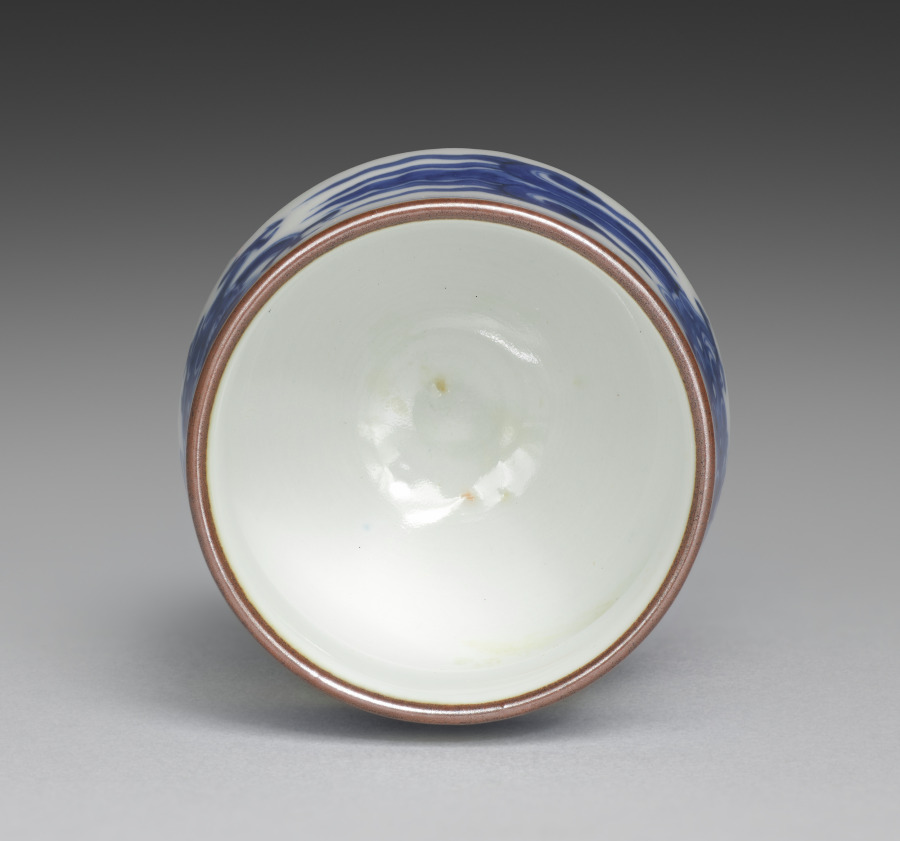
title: Cup from Sake Cups with Dragons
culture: Japan, Meiji period (1868–1912)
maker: Seifū Yohei III (Japanese, 1851–1914)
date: c. 1893–1914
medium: One from a set of six sake cups; porcelain with underglaze blue and iron oxide rims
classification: Ceramic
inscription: 大日本清風造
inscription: 清風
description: Each of these sake cups pictures two backward-looking dragons. The highly stylized creatures resemble jade carvings.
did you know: Seifū Yohei III was inspired by the Chinese mythical animals that were common on porcelain objects made at Jingdezhen in China during the Ming dynasty (1368–1644) and then exported around the world.